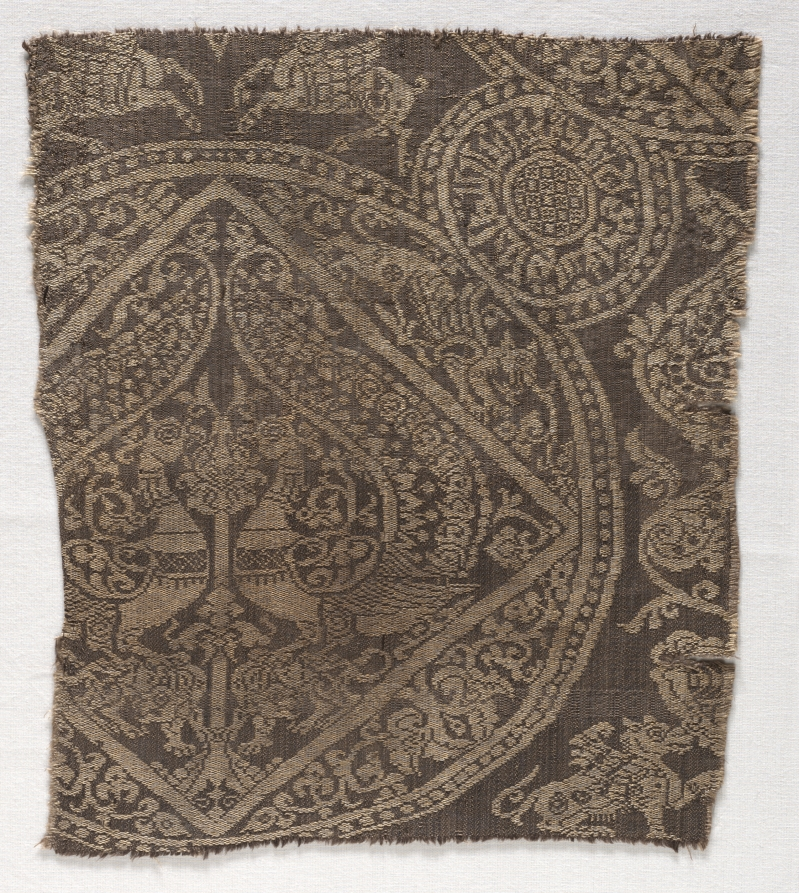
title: Fragment from a funeral garment or pall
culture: Iran ?, in the style of the Buyid period (945–1055)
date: 1649–1955 (radiocarbon date, 95% probability)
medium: Silk: lampas weave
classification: Textile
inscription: 'izz wa-iqbal lil-sahib Abi Sa'id Yahya bin Ziyad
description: An incomplete pearl-bordered roundel frames a diamond containing a pair of confronting peacocks that flank a Tree of Life and stand on a pair of confronting lions or dogs. Interspaces between diamond and border contain a pair of griffins (above) and a floral/vine motif (below). Winged bodies of confronting goats(?) stand on top of roundel and at right is an ornate palmette supported by a griffin. Tangential to the roundel at the upper right is a smaller pearl-framed medallion containing a circular Kufic inscription around a diaper-patterned center.